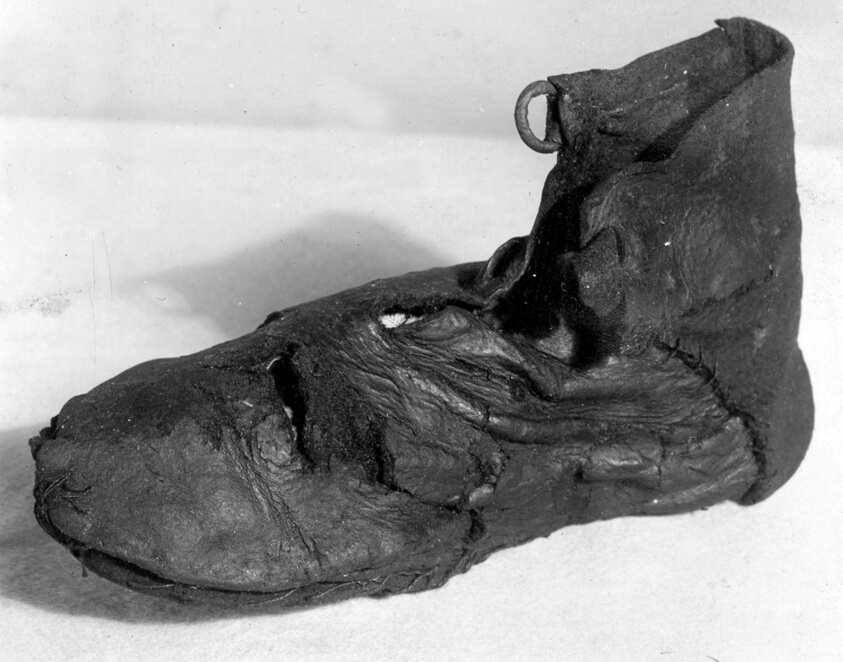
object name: Textile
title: Ankle Boot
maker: England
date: 16th century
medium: Leather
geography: England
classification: textile; costume accessory - shoe; shoes - misc; costume; dress (garment); clothing